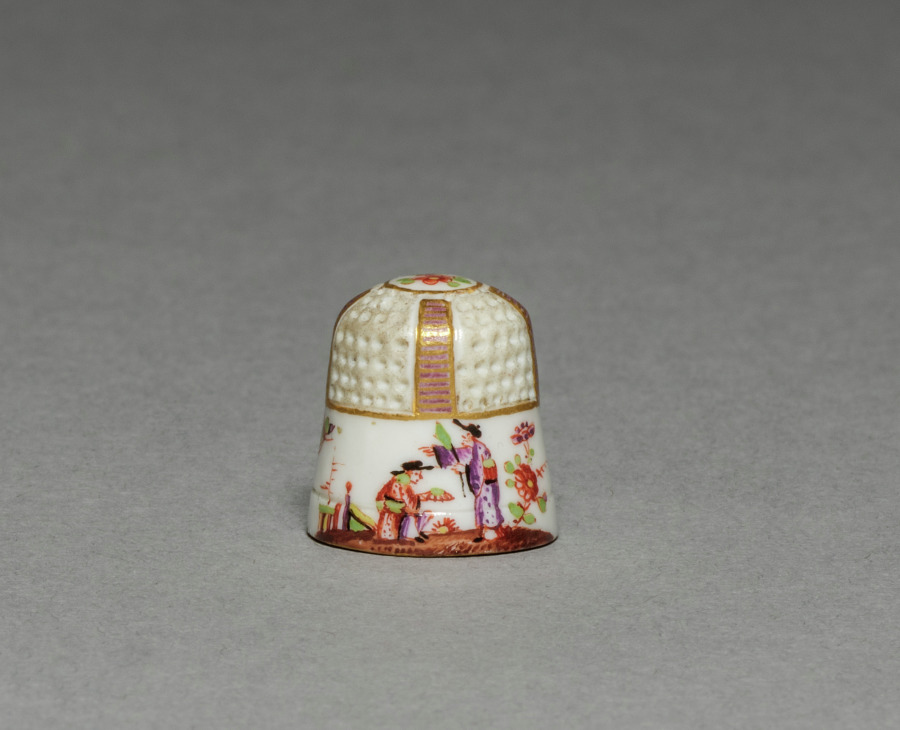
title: Thimble and Container (Thimble)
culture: England, mid-18th century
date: mid-18th century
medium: enamel on metal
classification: Enamel